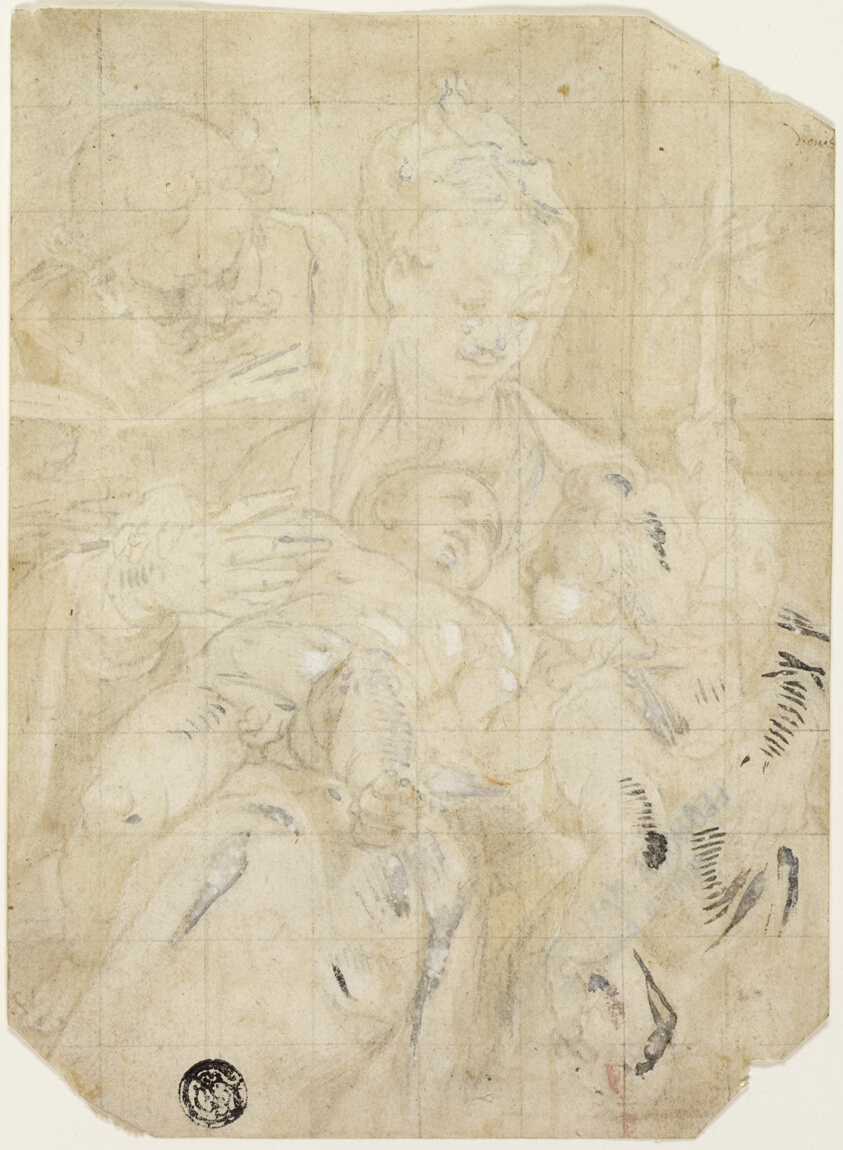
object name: Drawing and Watercolor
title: Holy Family with the Infant Saint John the Baptist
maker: Denys Calvaert (Flemish, c. 1540-1619)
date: 1580/85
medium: Black chalk and brush and pale brown wash, heightened with lead white (partially discolored), on ivory laid paper, tipped onto ivory laid paper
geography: Italy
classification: chalk and wash; drawings (visual works); prints and drawing